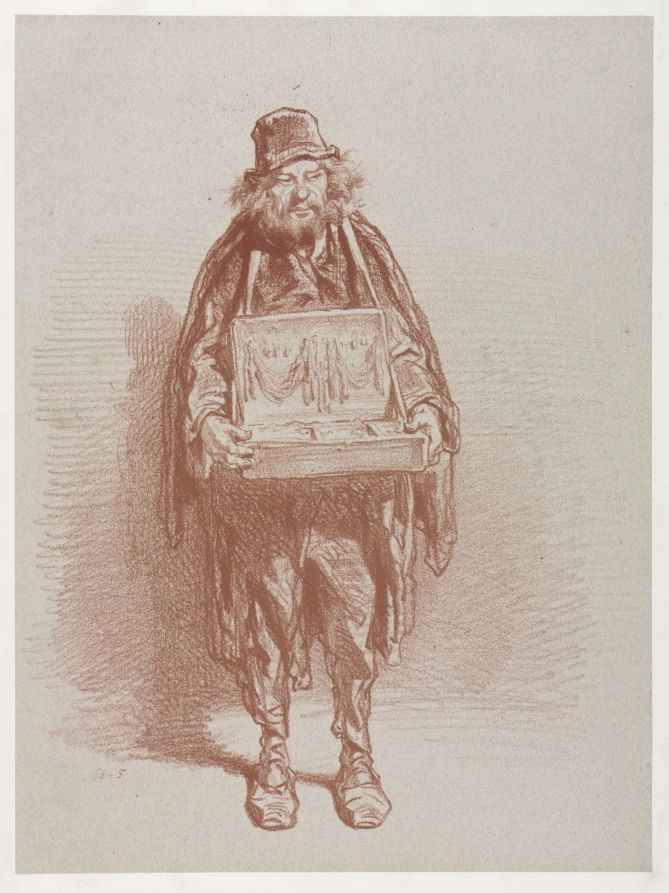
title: Mercier Ambulant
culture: France, 19th century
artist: Paul Gavarni (French, 1804–1866)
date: c. mid-1800s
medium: lithograph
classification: Print